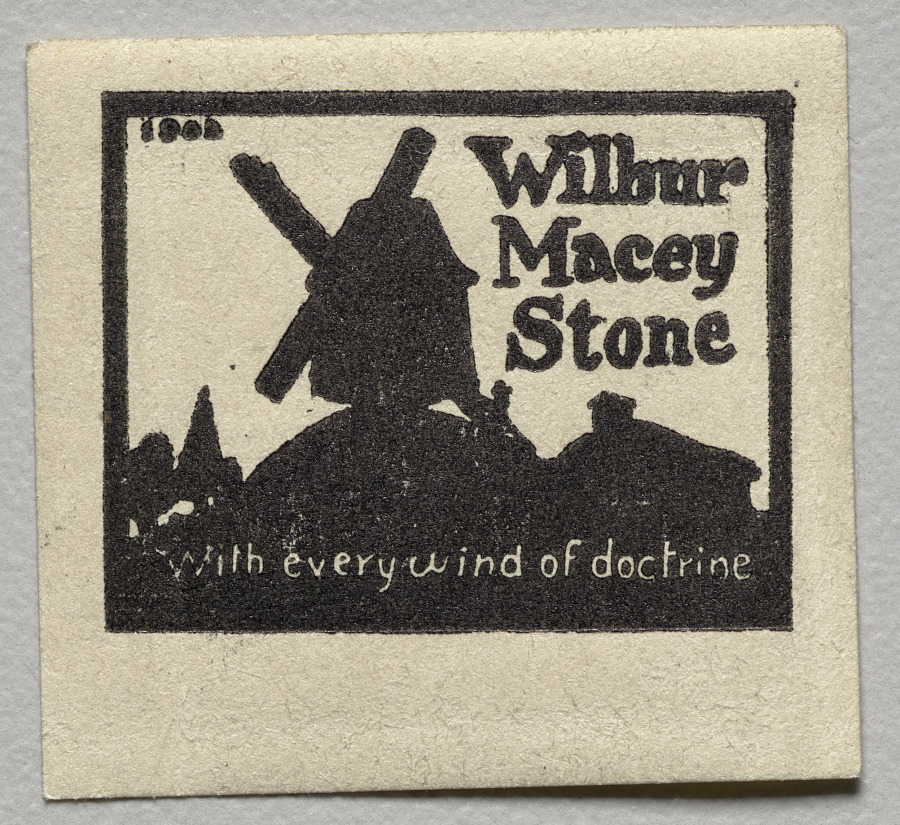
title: Bookplate: Wilbur Macey Stone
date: 1904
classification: Print